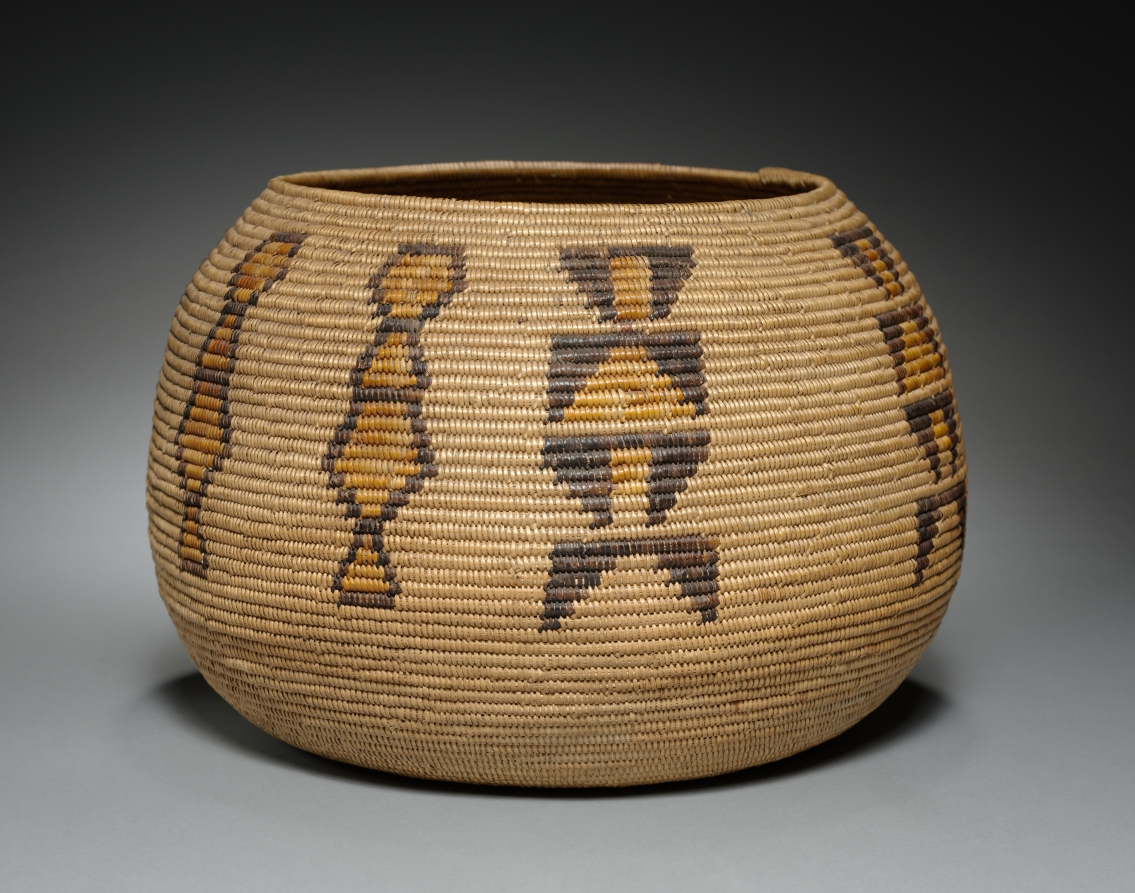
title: Gift Basket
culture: California, Cahuilla (Mission, Saboba Mission), Unassigned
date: c. 1900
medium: Juncus, sumac; coiled, deergrass bundle foundation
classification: Basketry